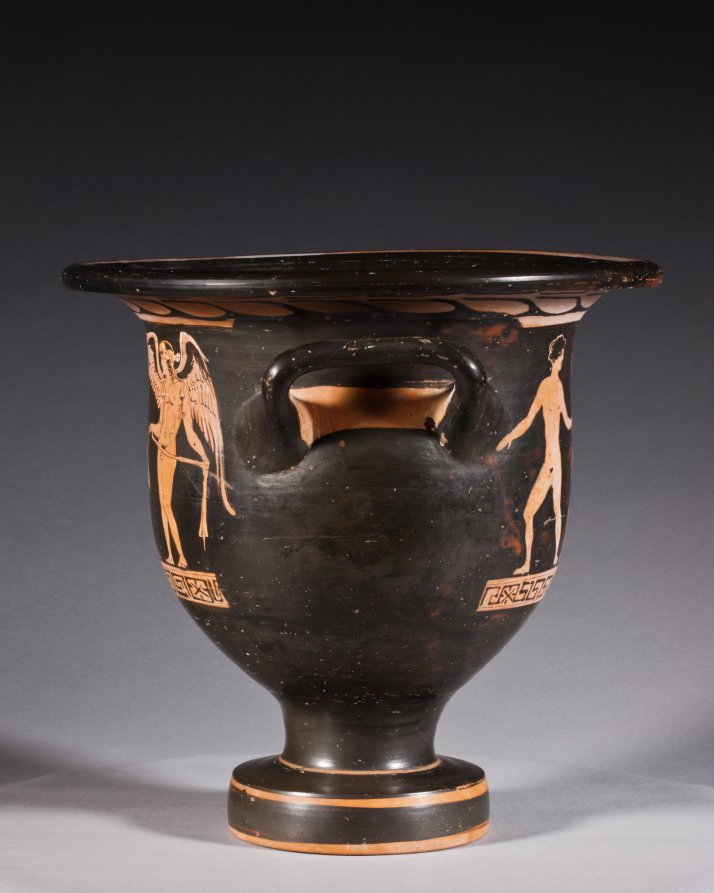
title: Red-Figure Bell Krater (Mixing Vessel): Aphrodite and Eros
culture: South Italian, Apulian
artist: attributed to Graz Painter (South Italian, Apulian, active c. 380–360 BCE)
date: c. 370–360 BCE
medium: ceramic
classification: Ceramic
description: This small mixing vessel shows a finely dressed woman seated on a chest and holding up a mirror to admire herself. Before her stands Eros, the winged god of love, holding a ribbon or sash. Behind the woman stands a pillar with the inscription ΑΦΡΟΔΙΤΗ, or APHRODITE, the goddess of love. Such labels are rare on vases, and scholars debate whether this names the woman shown as Aphrodite herself, with her son Eros, or a bride envisioning herself as Aphrodite, just before her wedding.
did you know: The dancing nude youths on the reverse are unusual; typically they would be standing and draped.